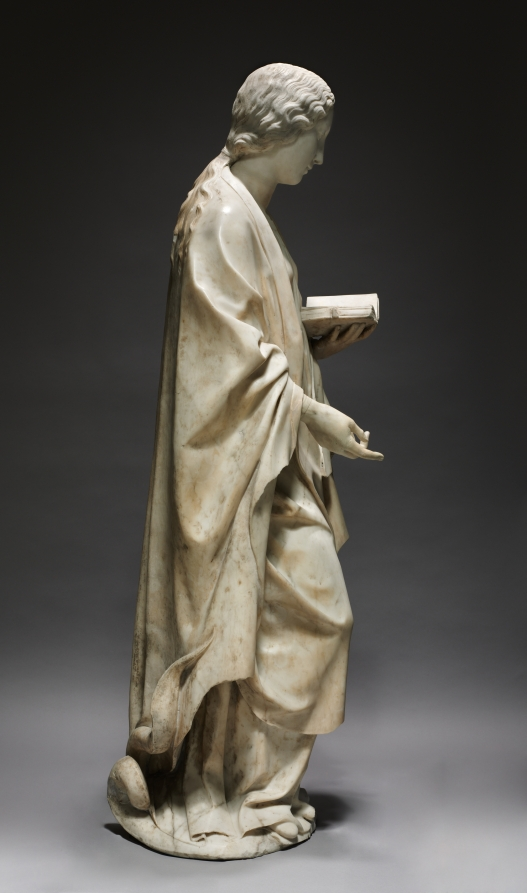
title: Saint Margaret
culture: Italy, Sicily, Palermo, 16th century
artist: Antonello Gaggini (Italian, 1478–1536)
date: c. 1520–1530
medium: marble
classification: Sculpture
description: Gaggini was a member of a large family of sculptors whose Palermo workshop supplied monumental religious sculptures for the cathedrals of Palermo and Messina in Sicily and Montelione in Calabria. After 1507 Antonello himself worked for 15 years to produce marble sculptures for Palermo Cathedral. This figure of the legendary virgin martyr, Saint Margaret, was probably commissioned for one of these ecclesiastical foundations, possibly the chancel of Palermo Cathedral. The saint is shown reading from a book of hours (a sign of her piety) and trampling upon a dragon, the symbol of Satan. The dragon became the attribute by which she is recognized in sacred art.